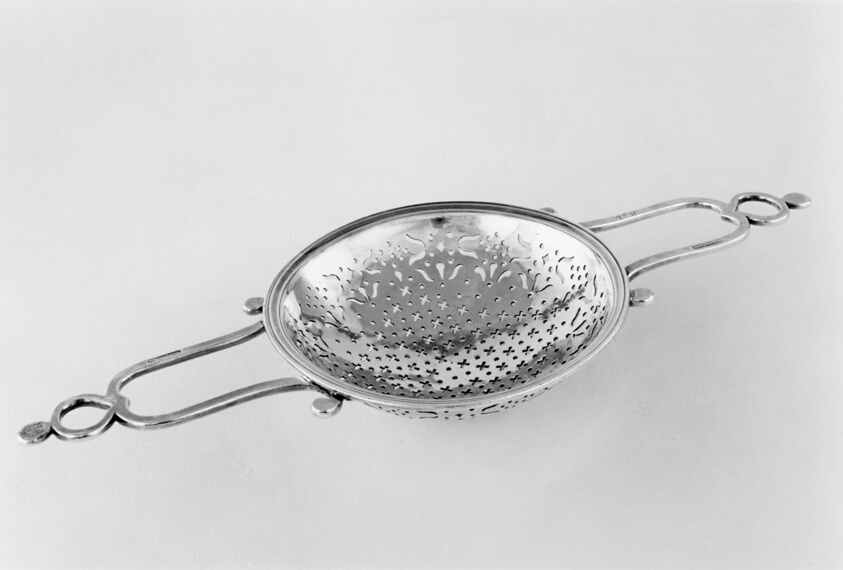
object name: Metalwork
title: Punch Strainer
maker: William Simpkins; American, 1704–1780; Boston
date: 1743–60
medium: Silver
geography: Boston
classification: utensil for serving food; utensil; silver; american decorative arts; american arts; decorative arts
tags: dining, drinking